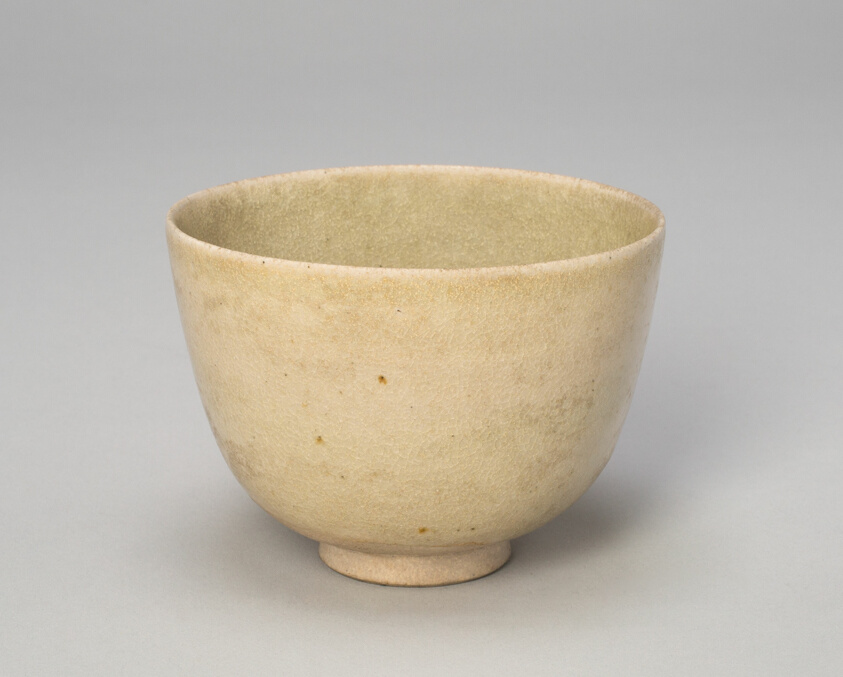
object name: Vessel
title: Cup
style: Chinese (culture or style)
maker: China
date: Sui dynasty (581–618)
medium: Stoneware with cream-colored glaze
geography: China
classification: drinking vessel; ceramics; asian art; vessel